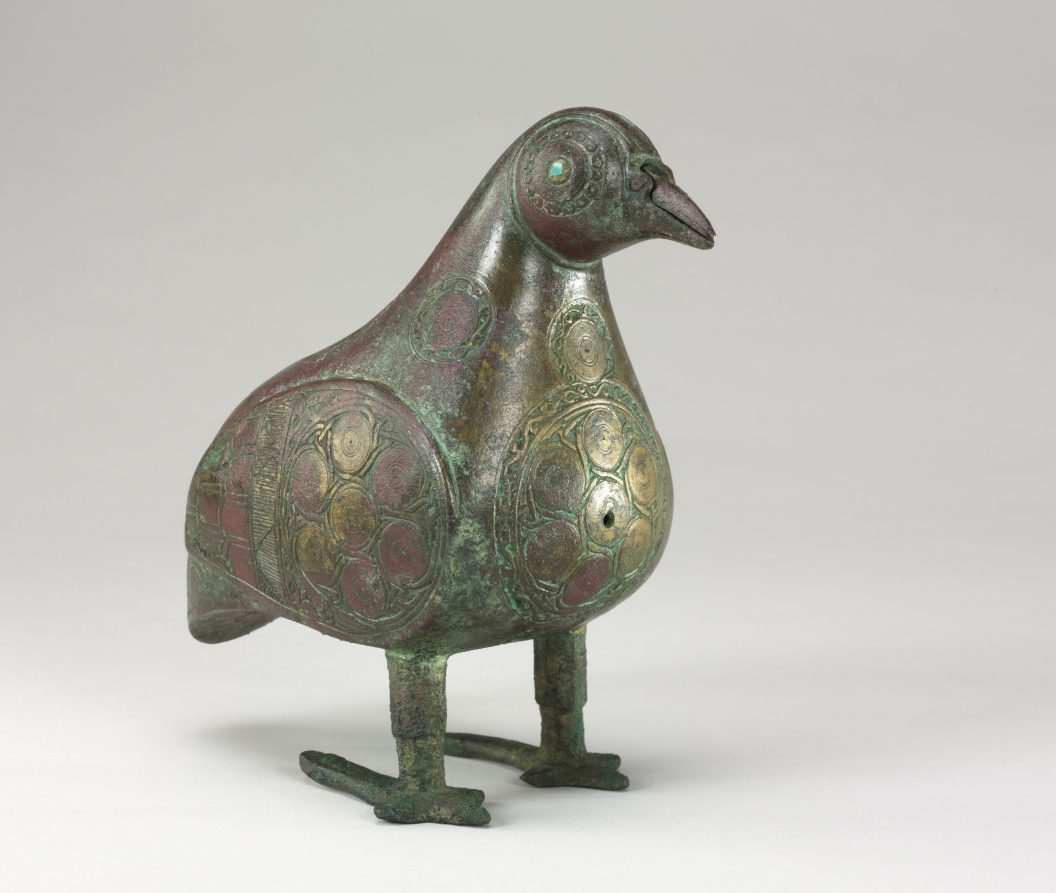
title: Bird-shaped Vessel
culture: Iran, Seljuq period (1037–1194)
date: 1100s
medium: bronze, cast, with chased and chiseled decoration; eyes inlaid with blue glass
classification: Metalwork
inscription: Kufic inscription above tail feathers, undeciphered, possibly pseudo-inscription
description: This bird-shaped vessel may have been used as a medieval water vessel (aquamanile) for pouring water used in handwashing—an important element of secular and sacred rituals. In this piece, water could have been placed in the vessel through a hole in the bird’s chest and then poured out through the hinged beak. Birds in Islamic art often represented messengers and protectors, or symbolized freedom of the spirit and soaring of the soul. Possibly the blue-green eyes were considered good luck charms to protect the owner from the evil eye and to ward off misfortune.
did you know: There is an undeciphered Kufic inscription above the bird's tail feathers.